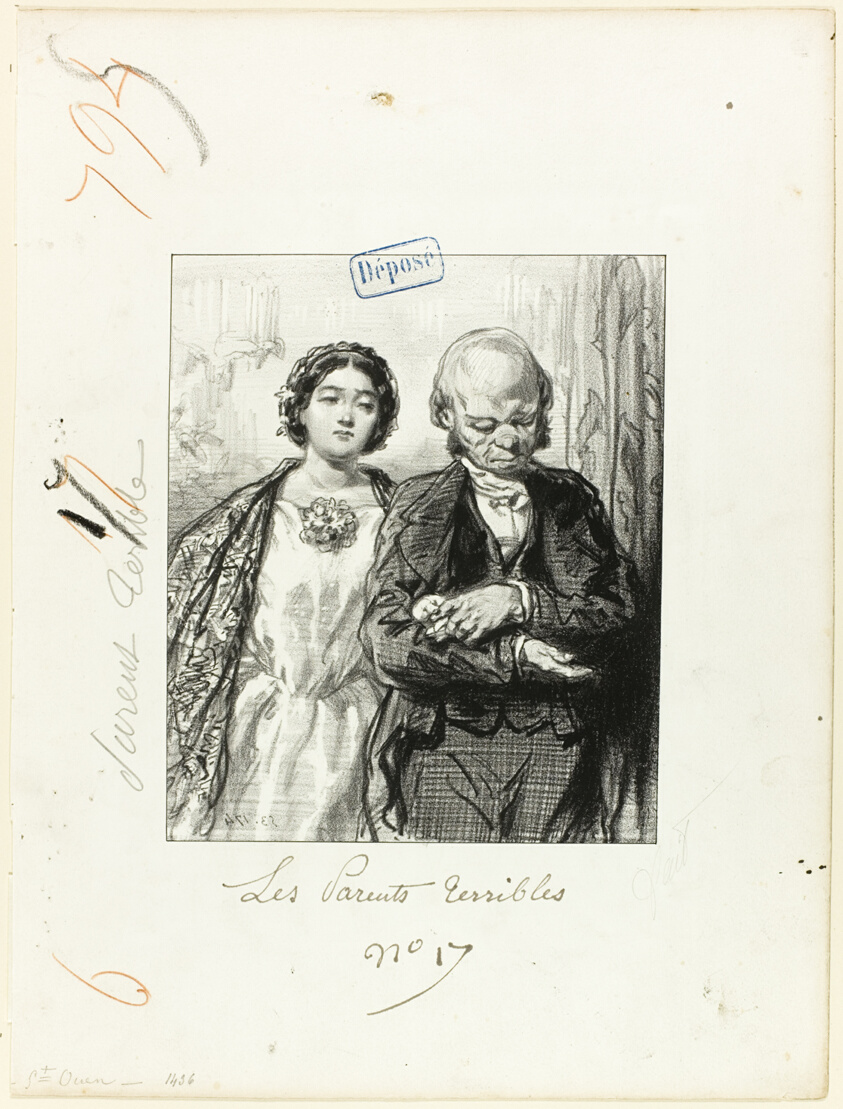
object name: Print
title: Les-Parents-Terribles series: Come, come a ball's always the same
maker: Paul Gavarni (French, 1804-1866)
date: 1853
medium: Lithograph in black on cream wove paper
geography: France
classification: lithograph; print; prints and drawing